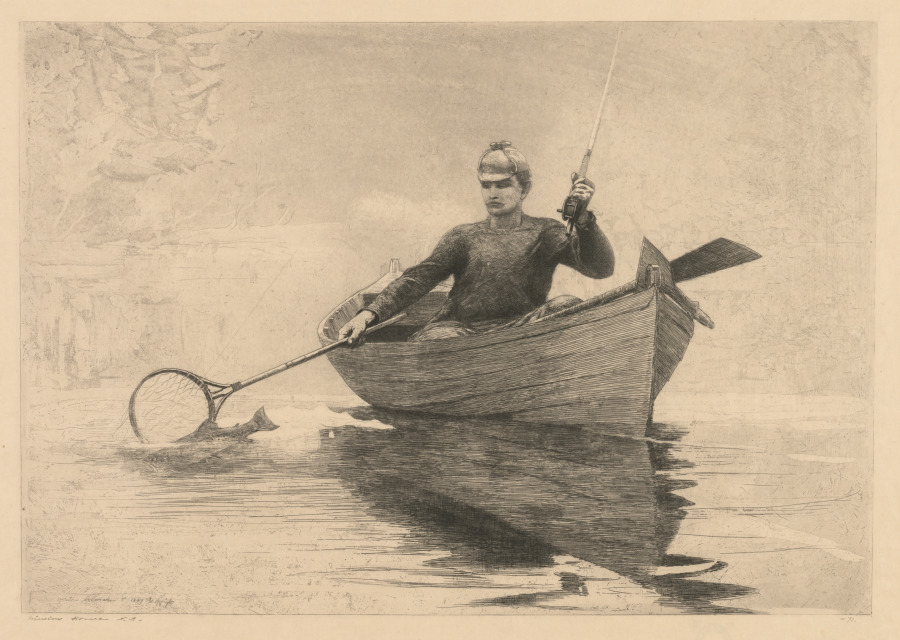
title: Fly Fishing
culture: America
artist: Winslow Homer (American, 1836–1910)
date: 1889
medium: etching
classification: Print